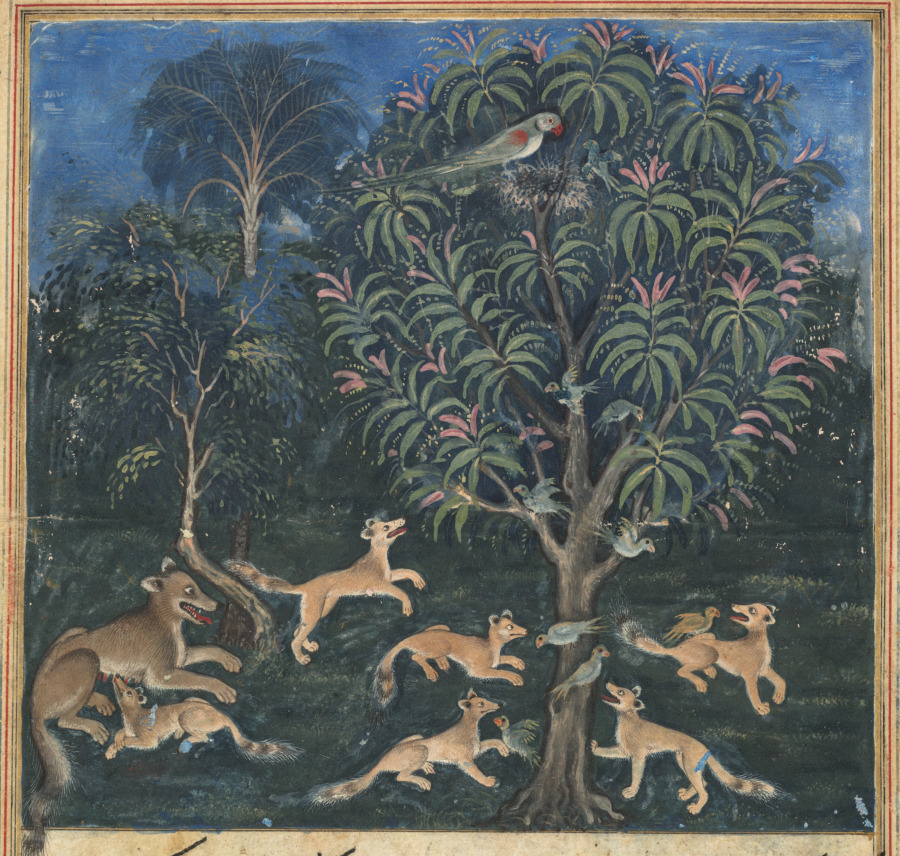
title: The parrot mother cautions her young on the danger of playing with foxes, from a Tuti-nama (Tales of a Parrot): Fifth Night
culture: Mughal India, court of Akbar (reigned 1556–1605)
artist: Dasavanta (Indian, d. 1584)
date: c. 1560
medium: gum tempera, ink, and gold on paper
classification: Painting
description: One night the parrot Tuti tells Khujasta that he hopes her relationship with her new lover does not wind up being only half-baked, like the medical treatment of the king of Kamarupa. She asks what that was about, and Tuti begins the story by telling of a mother parrot who lived in the forest with her young, who liked to play with the fox cubs who lived at the base of the tree. The mother parrot is perched on the edge of her treetop nest.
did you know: A fox cub suckles contentedly, as the mother keeps a sharp eye on the others.